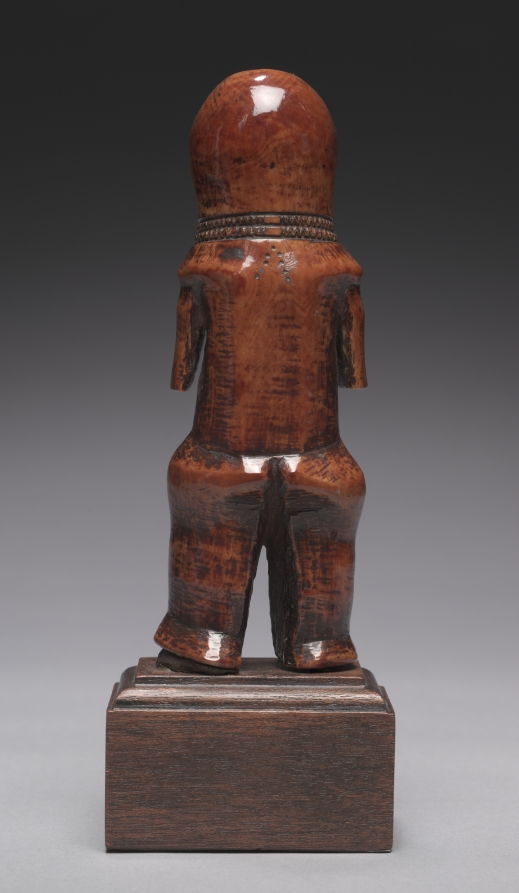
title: Figure (iginga)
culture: Africa, Central Africa, Democratic Republic of Congo, Lega-style maker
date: probably 1800s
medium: Elephant ivory, tukula, and oil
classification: Sculpture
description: The life of Lega men and women is structured around their advancement through the different grades of the Bwami association. Fulfilling political, social, religious, and other roles, the members’ ultimate purpose is the pursuit of wisdom and excellence. Ivory figurines were reserved for members of the two highest Bwami grades, in which the core of the Lega’s moral philosophy is revealed.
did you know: The dark surface (patina) of this sculpture comes from years of handling and the application of oil and a red powder called tukula; it was originally cream-colored!